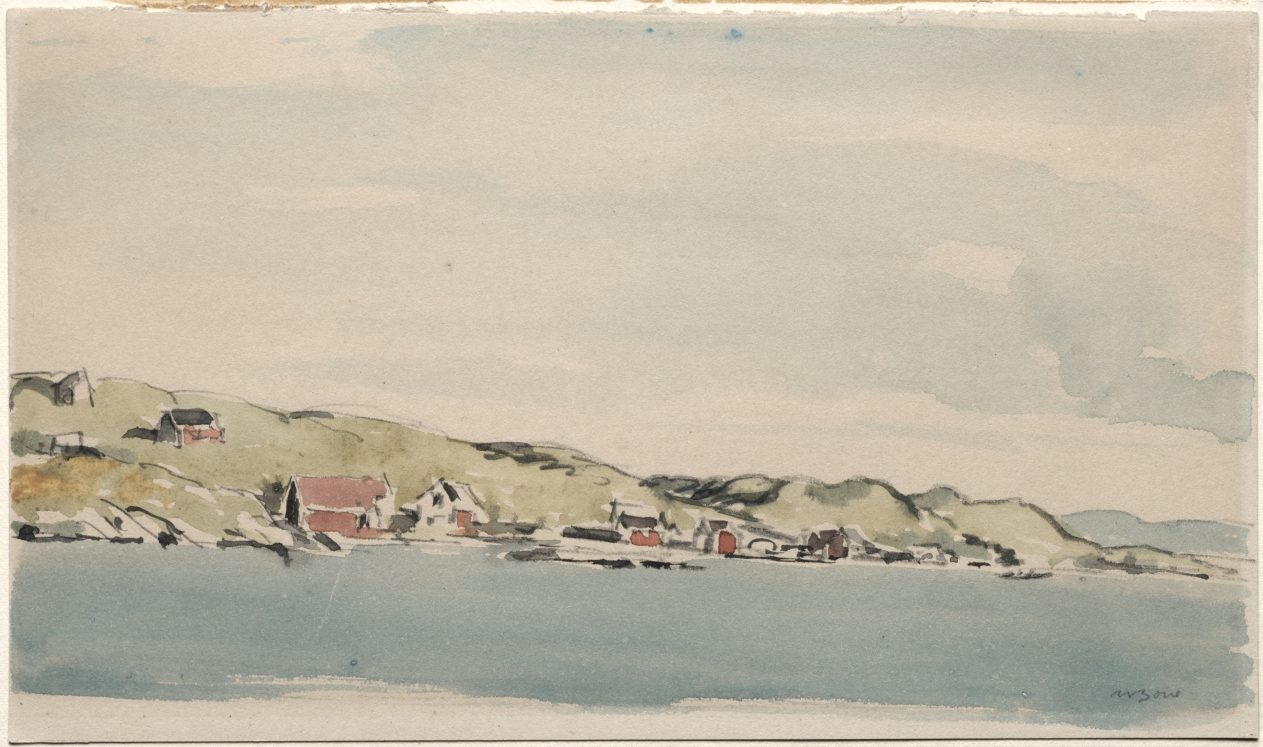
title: Entering Bergen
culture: England, 20th century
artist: Muirhead Bone (British, 1876–1953)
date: c. 1896–1953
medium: watercolor and graphite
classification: Drawing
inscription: Lower right, in graphite: M. Bone